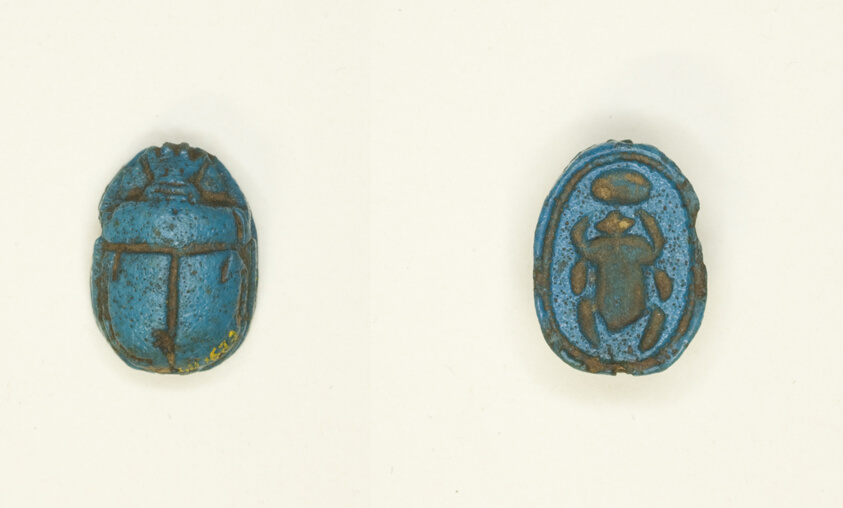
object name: Costume and Accessories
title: Scarab: Scarab Beetle with Sun Disc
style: second intermediate period, egyptian, ancient, fifteenth dynasty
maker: Egyptian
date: Second Intermediate Period, Dynasty 15 (about 1650–1550 BCE)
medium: Faience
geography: Egypt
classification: scarab; ancient art; costume; faïence (composite material)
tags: Hieroglyphs, insects